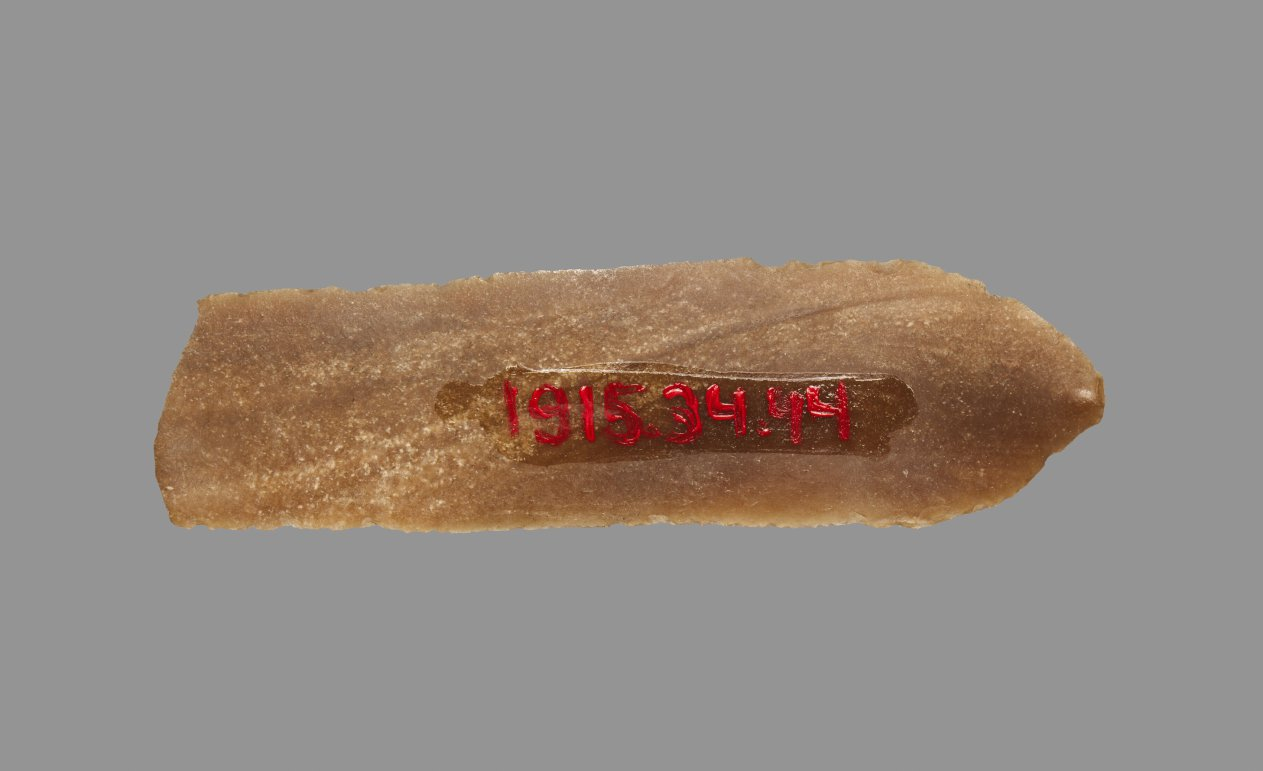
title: Sickle Blade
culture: Egypt, Middle Kingdom (2040–1648 BCE), Dynasty 12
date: 1980–1801 BCE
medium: flint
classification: Implements